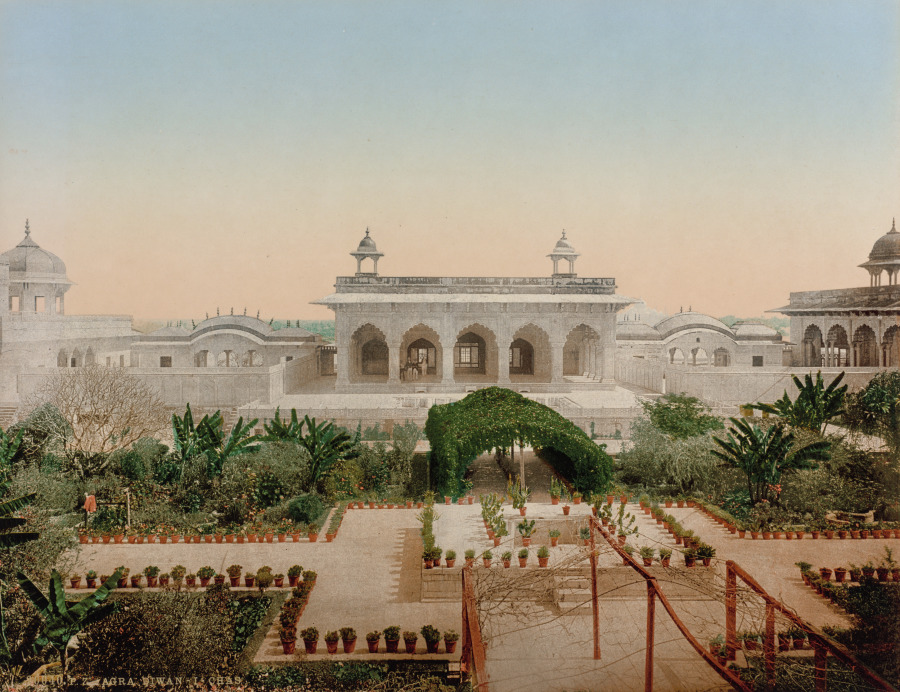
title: Agra. Diwan-i-Chas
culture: India, 19th century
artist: Photoglob Co. (Zurich, active c. 1890–1910)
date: 1890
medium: Photochrom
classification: Photograph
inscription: Imprinted in gold on recto in lower left corner: “20040. P.Z.-AGRA DIWAN-I-CHAS”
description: This Hall of Private Audiences was built by Shah Jahan, who commissioned the Taj Mahal. There, he and the succeeding Mughal emperors met with courtiers and important guests. Several men in European dress exit the hall, while men in native garb labor in the lush gardens. The tiny figures emphasize the building’s grand scale.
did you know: The rosy sky was an imaginative addition by the printers, as this print is based on a black-and-white photograph.